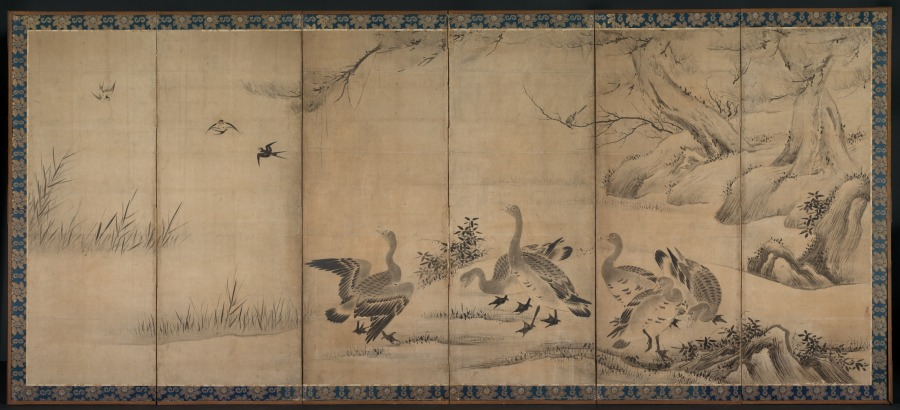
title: Wild Geese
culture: Japan, Edo period (1615–1868)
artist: Kano Sanraku (Japanese, 1559–1635)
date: late 1500s-early 1600s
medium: pair of six-fold screens; ink on paper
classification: Painting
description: Depictions of geese usually appear as ink paintings in Japan during the 1200s. They later show up in the colorful landscapes of illustrated handscrolls. Such early ink renditions of the birds have long been associated with classical Chinese Zen painting and poetry, which was avidly admired and collected in medieval Japan. In the screens on display, the artist portrayed the waterfowl in a pastoral setting without reference to classical or religious themes. Such ordinary subjects were imbued with special meaning in 14th- and 15th-century Japan through associations with continental culture, Zen thought and poetry, and famous Chinese monk-painters whose painting techniques had become revered as visual emblems of Zen principles. The screens here reflect the continuation of that painting tradition in the late 1500s or early 1600s by the head of the most important studio in Kyoto. Sanraku also executed a number of colorful folding screen compositions, but here pays homage to the style of early Zen painting.